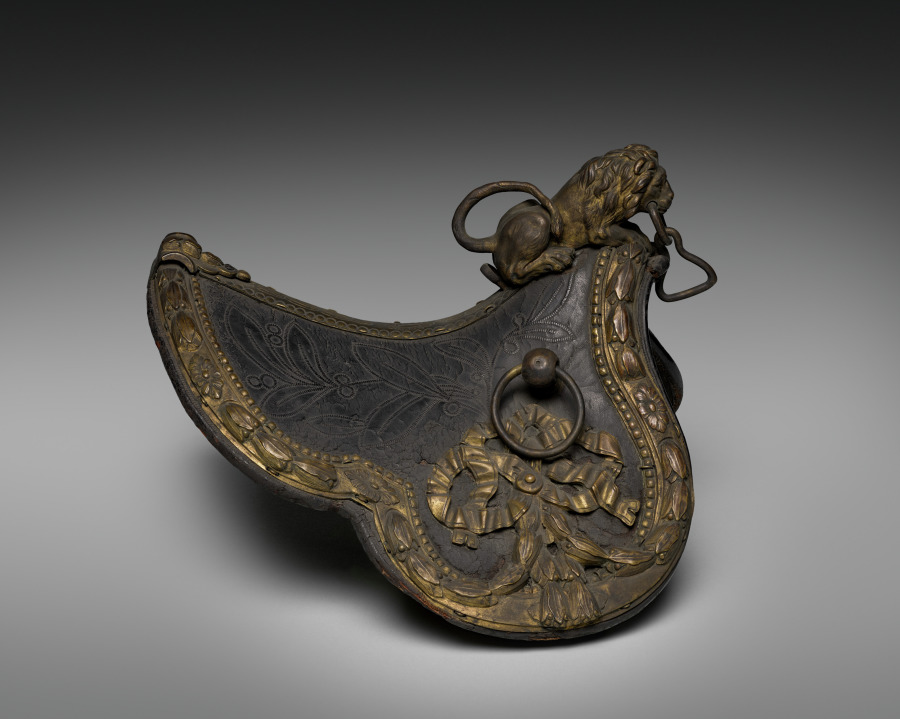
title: Child's Harness Saddle with Lion Pommel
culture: France, 17th century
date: 1600s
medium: leather, tooled with wood, canvas and steel on a brass frame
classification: Arms and Armor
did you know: This child-sized harness saddle was said to have been used in a riding school.